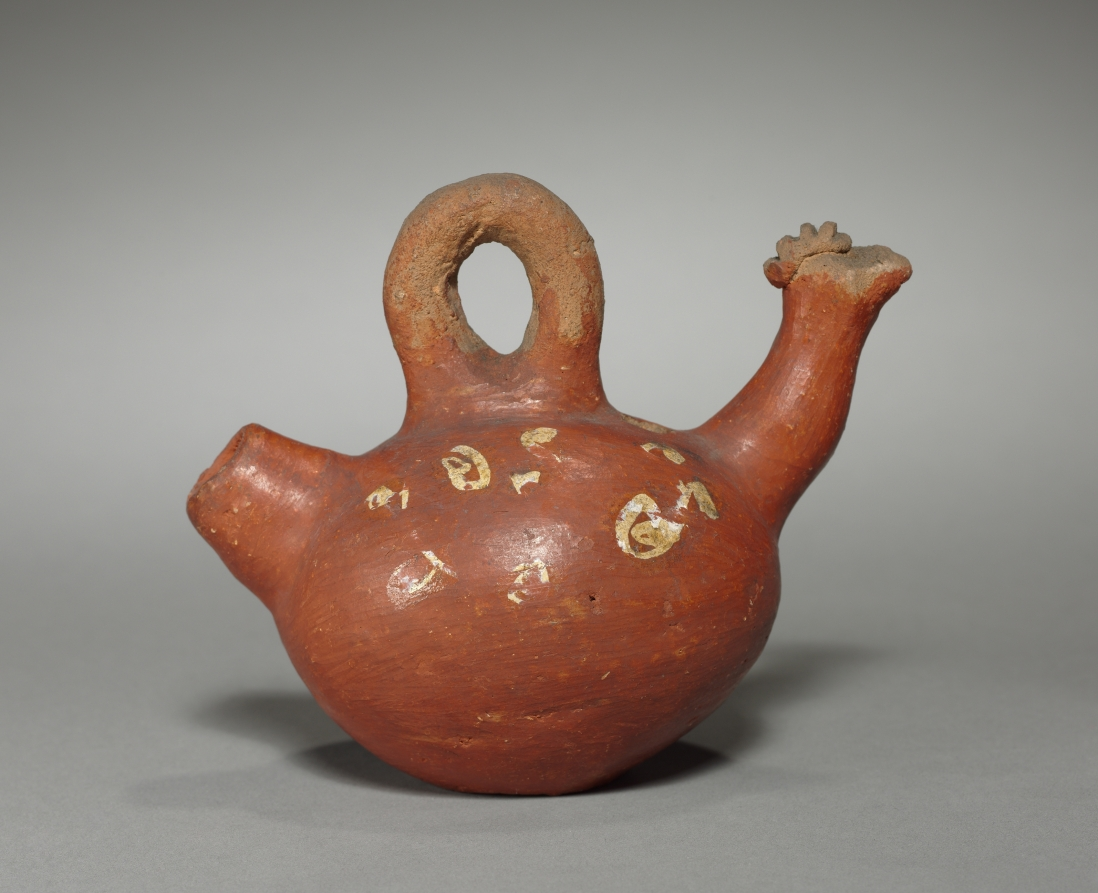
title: Bottle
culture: Peru, 20th century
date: 1900–1920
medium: pottery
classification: Ceramic